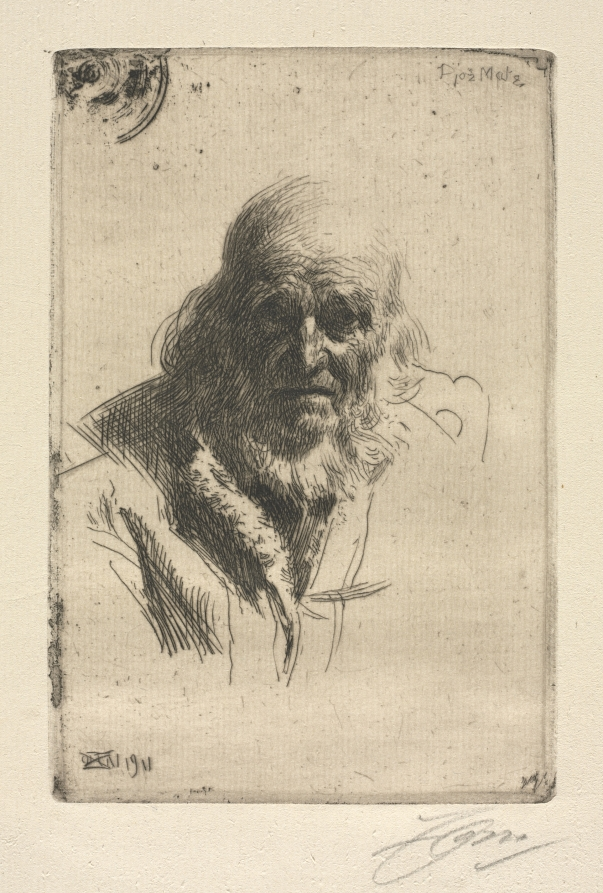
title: Djos Mats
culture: Sweden, 20th century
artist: Anders Zorn (Swedish, 1860–1920)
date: 1911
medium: etching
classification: Print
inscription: lower right margin, in pencil: "A Zorn"